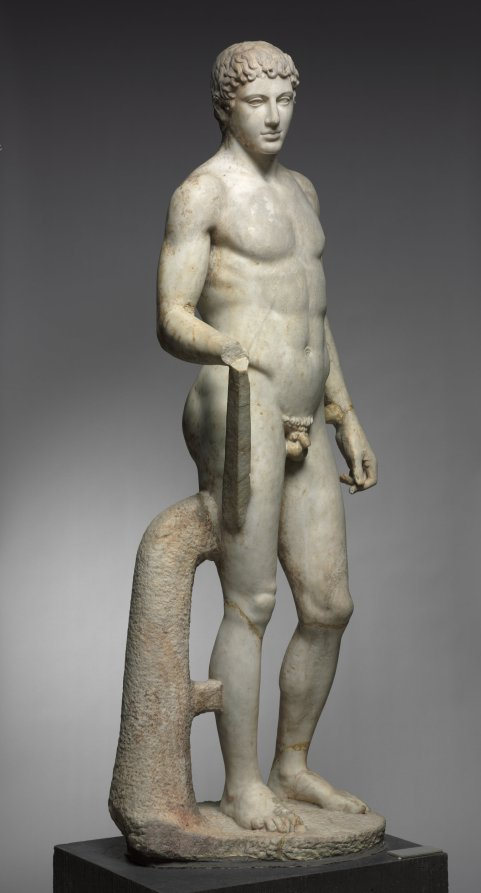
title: Statue of an Athlete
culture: Italy, Roman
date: 1–100 CE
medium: marble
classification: Sculpture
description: This idealized athlete recalls Greek sculptural types invented and popularized during the 400s BC. Large-scale athletes and other sculptures like this were originally created by famous artists as sanctuary dedications. Centuries later, they were widely copied and adapted by Roman sculptors, whose clients sought their own versions of earlier masterpieces. Working in marble rather than bronze, these sculptors added certain elements for stability, such as the struts and the large tree trunk beside the right leg here. Sculptures like this one are profoundly complex, made by and for Romans but descended from Greek ancestors.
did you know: For many years, this sculpture stood in the rotunda of the Cleveland Museum of Art.